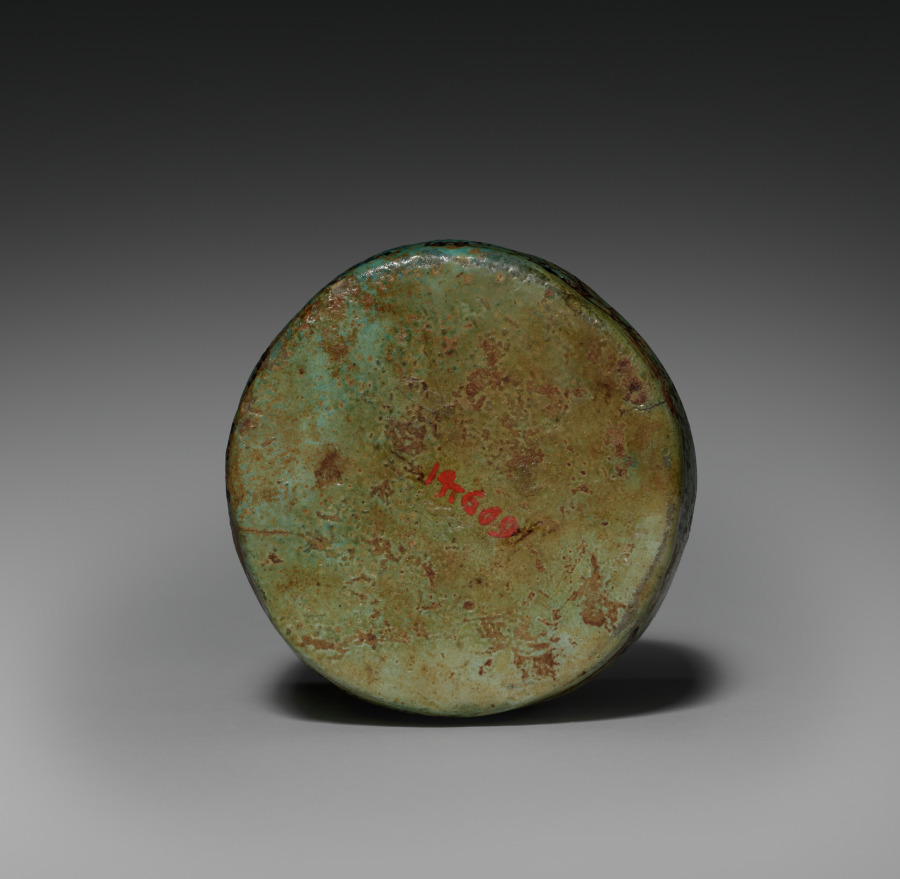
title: Pyxis with Lid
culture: Egypt, Middle Kingdom (2040–1648 BCE)–New Kingdom (1540–1069 BCE)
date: c. 1901–1525 BCE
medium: turquoise faience with black decoration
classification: Vessels